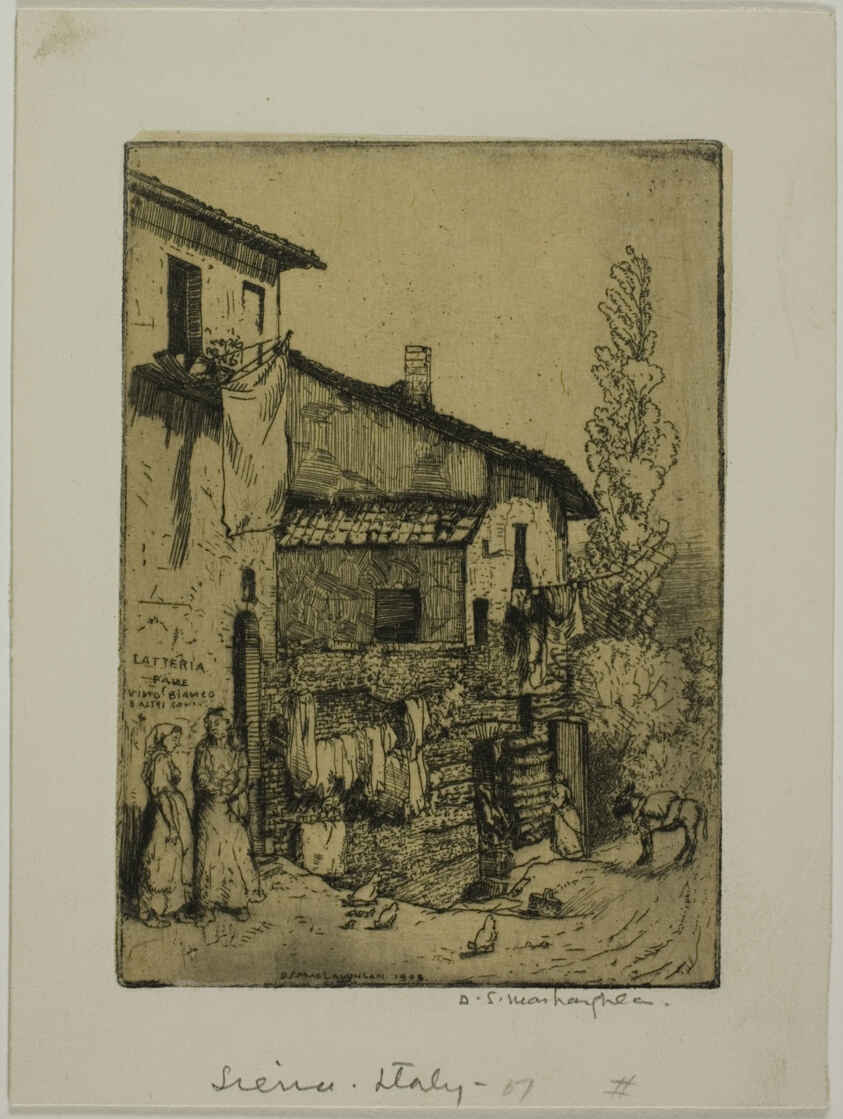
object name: Print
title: Siena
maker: Donald Shaw MacLaughlan (American, born Canada, 1876-1938)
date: 1905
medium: Etching in black on buff wove paper, laid down on cream wove paper (chine collé)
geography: United States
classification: etching; print; prints and drawing